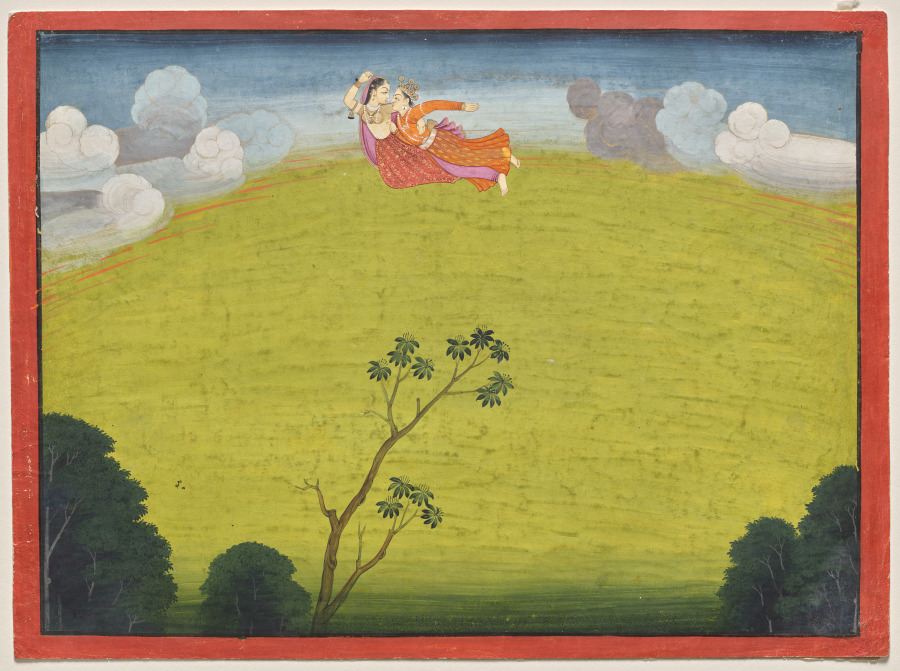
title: Pradyumna and Mayavati Fly to Dvaraka, from the Large Basohli Bhagavata Purana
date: c. 1760–65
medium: Gum tempera, ink, and gold on paper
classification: Painting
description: A goddess who can fly, Mayavati brings her lover Pradyumna to be reunited with his parents for the first time since he was an infant, when he was kidnapped by a demon who was her husband. Having just slain the demon, they can be together and return to the palace where he was born. Pradyumna is the son of Krishna, and also an incarnation of the god of love, Kama. Mayavati is an incarnation of Rati, the goddess of erotic love. Later, Pradyumna also marries his cousin Rukmavati.